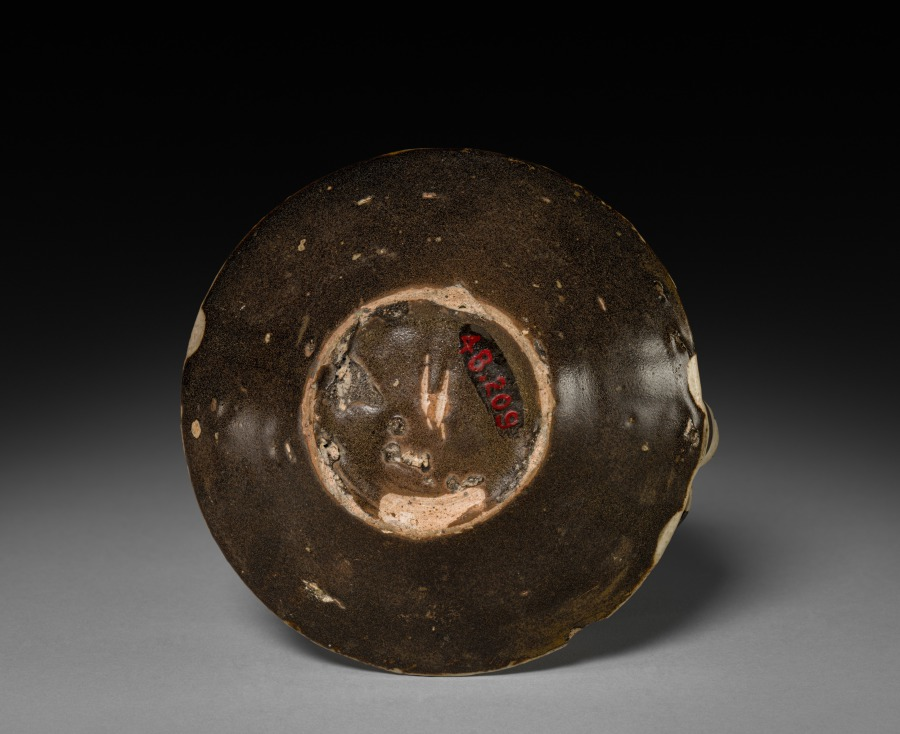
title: Water Dropper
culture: China, Yuan dynasty (1271-1368)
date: 1271–1368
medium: Stoneware, Cizhou ware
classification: Ceramic